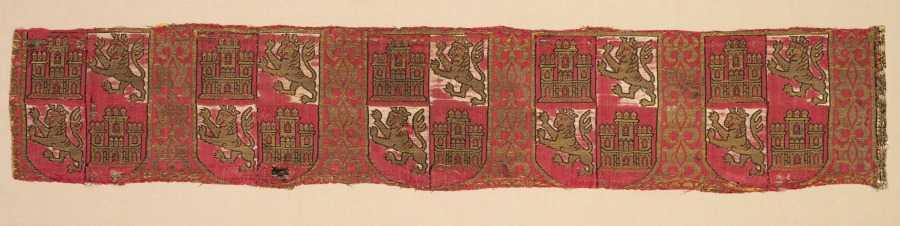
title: Lampas with heraldry of Castile and León, from a royal Christian robe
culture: Spain, Granada, Nasrid period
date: 1200–1325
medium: lampas: silk and gold thread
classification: Textile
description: Opulent gold thread forms heraldic shields of a Spanish king on a palmette ground. The shield bears the heraldic device of Castile and Leon, the castle and lion, which had decorated imperial Spanish garments for several centuries. The use of coats of arms was a European convention that was never adopted by the Muslims.